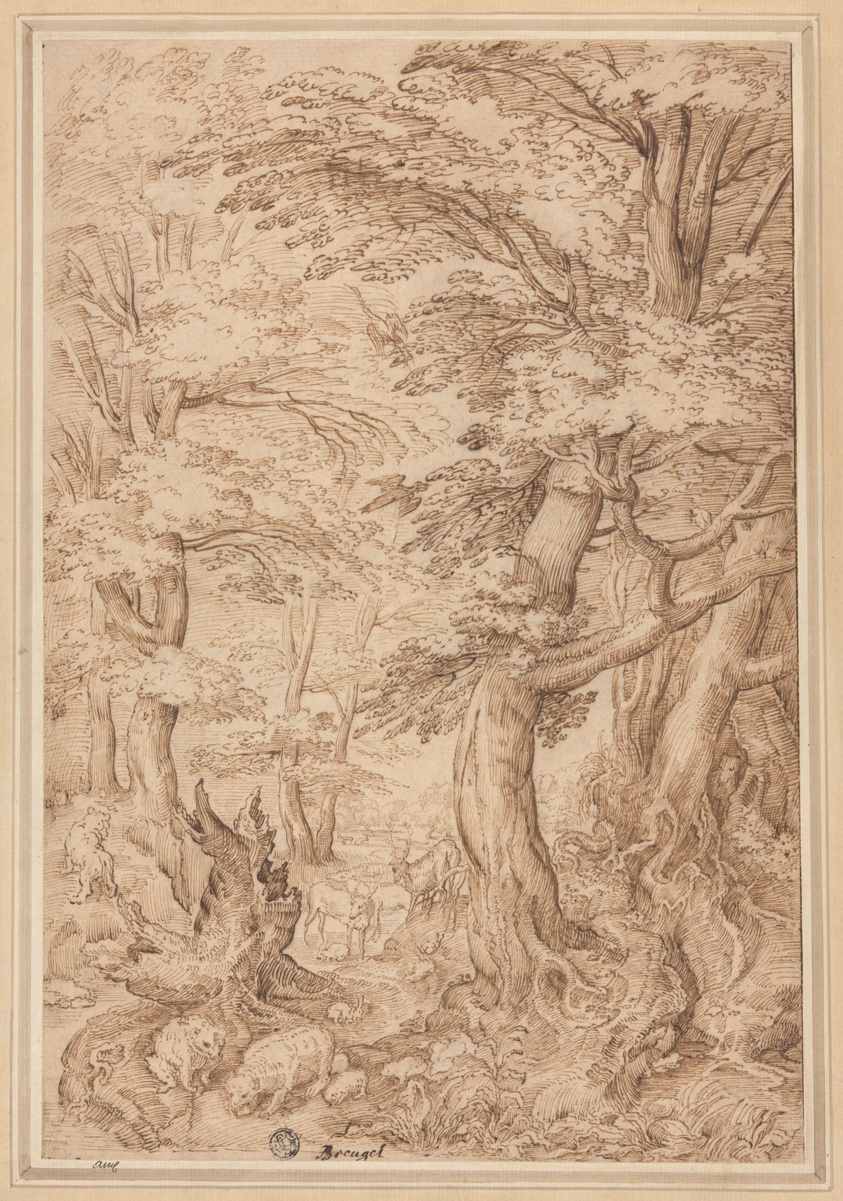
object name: Drawing and Watercolor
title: Forest Landscape with Wild Animals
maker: After Pieter Bruegel, the elder; Flemish, 1525/30-1569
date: late 16th century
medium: Pen and brown ink on buff laid paper, laid down on card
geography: Flanders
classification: pen and ink drawings; drawings (visual works); prints and drawing